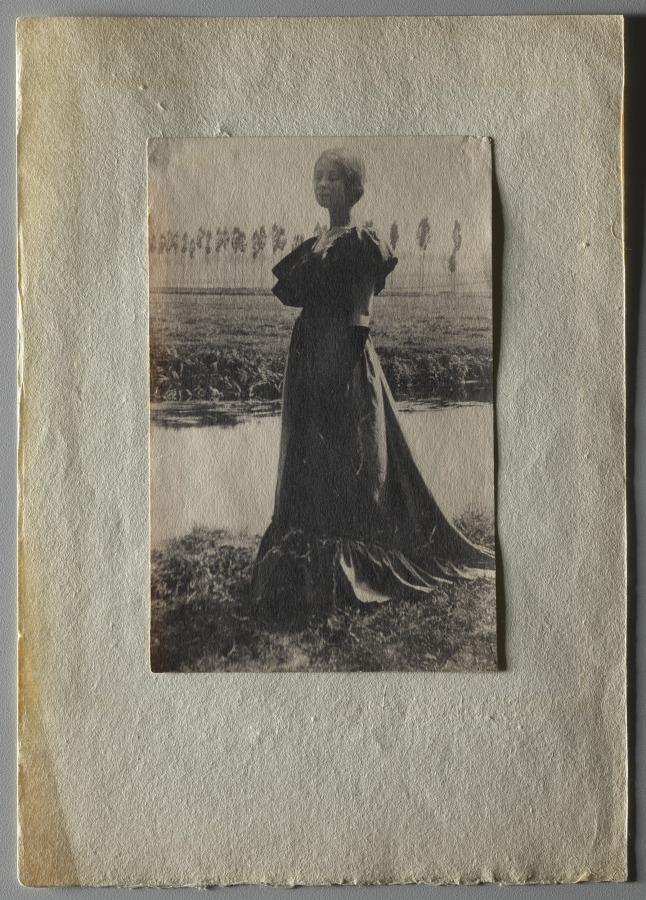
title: Italy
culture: America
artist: Gertrude Käsebier (American, 1852–1934)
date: c. 1889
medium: platinum print mounted to Japanese paper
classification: Photograph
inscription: Written in pencil on verso of photograph: Mar/7 x 10”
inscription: Written in pencil on verso of mount: “Kasebier x 1.08”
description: Italy provides insight into Käsebier’s earliest artistic productions. The woman’s pose and central placement emphasize the picture’s formalism and careful construction. Her rigid vertical posture echoes the trees in the background. Soft focus, a device borrowed from Pictorialist photography, frustrates a clear view of her features, suggesting that the image is neither portrait nor snapshot but a symbolic statement about womanhood and its association with nature.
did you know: Gertrude Käsebier did not begin to study art until she was 37 and had 3 adolescent children.